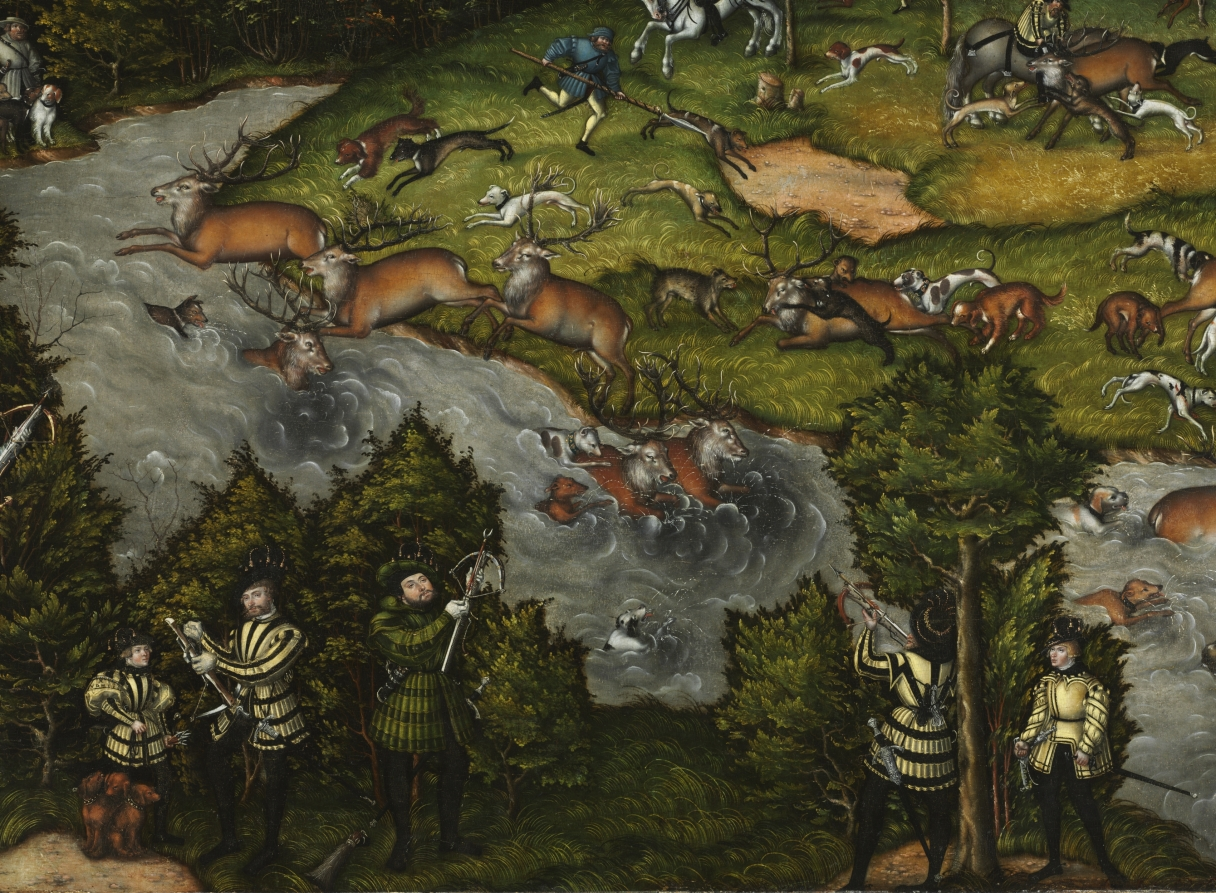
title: Hunting near Hartenfels Castle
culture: Germany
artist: Lucas Cranach (German, 1472–1553)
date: 1540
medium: oil, originally on wood, transferred to masonite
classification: Painting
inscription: Signed lower right on boat with a winged serpent, and dated: 1540 [inventory number, lower right: 1577]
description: The Protestant rulers of Saxony commissioned this animated hunt scene, set near their residence seen in the background, Hartenfels Castle (in eastern Germany). John Frederick the Magnanimous, in the bottom left corner, wears dark green hunting attire; he spans his crossbow and waits for his courtiers and dogs to chase a stag across the river. His wife, the Electress Sibylle, stands at right, poised to take the first ceremonial shot. The prince electors of Saxony were passionate practitioners of hunting with dogs—elaborate, highly rehearsed occasions, coordinated by the use of signals from hunting horns. Cranach dated this work and his signature is the winged snake at lower right. 1577 in the right corner is an inventory number.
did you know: Humans, dogs, and deer make up most of the creatures in this busy scene—but not all of them! Look closely at the background to spot a bear and three boars.